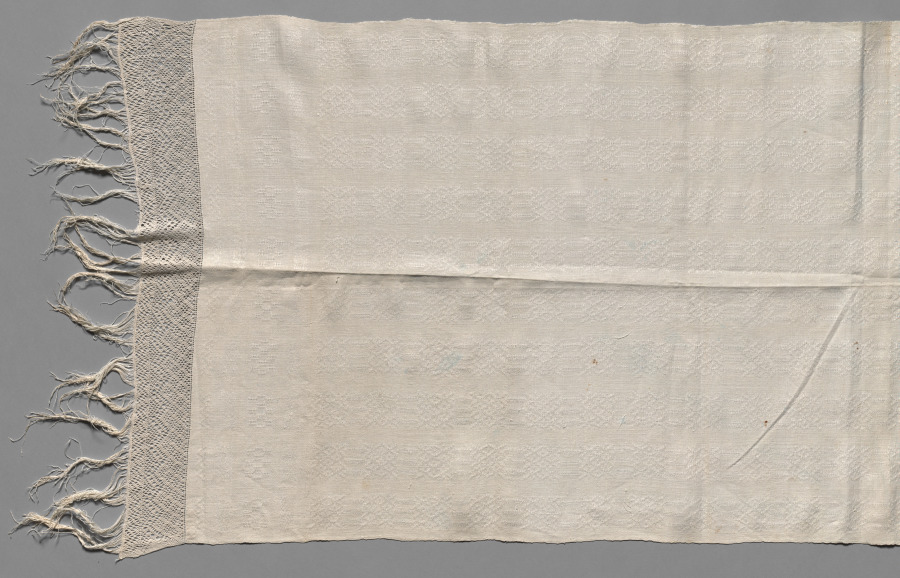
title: Towel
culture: Spain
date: 1900–1920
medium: Linen: patterned plain weave with knotted lace (macramé)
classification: Textile